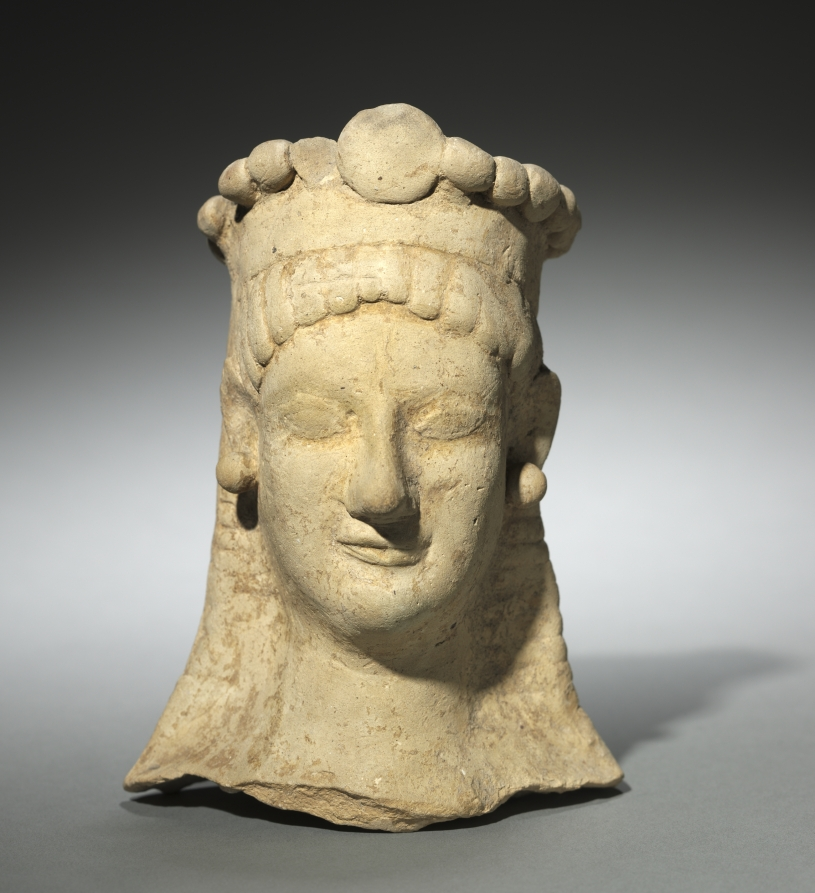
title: Woman's Head with Crown and Earrings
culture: Greece, Sicily(?)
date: 600–475 BCE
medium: terracotta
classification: Sculpture